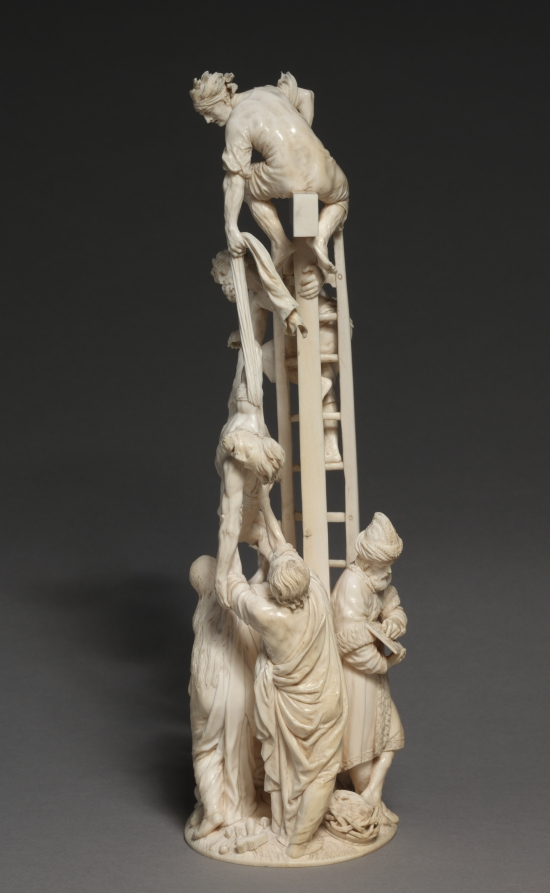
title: Descent from the Cross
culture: Austria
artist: Adam Lenckhardt (German, 1610–1661)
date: 1653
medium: ivory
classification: Sculpture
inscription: inscribed with monogram "AL" conjoined and dated 1653.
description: Carved from a single piece of ivory for Prince Karl Eusebius von Liechtenstein of Vienna, this work is a true tour-de-force. It took Lenckhardt seven years to complete; it is his last known sculpture and the pinnacle of his career. The biblical accounts of the descent from the cross found in the gospels are not consistent, which may contribute to the difficulty in precisely identifying the figures. The Virgin Mary, Saint John, Mary Magdalene, and others were said to be present, but undoubtedly there are other disciples here mourning Christ’s death. The intense emotion registers on the faces of the figures in the scrupulous and exquisitely detailed work.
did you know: Carved from a single elephant tusk, the artist took special care to ensure the ivory did not crack or break as he meticulously crafted each figure in this visually exciting sculpture. Look closely to find tools and small objects included near its base.